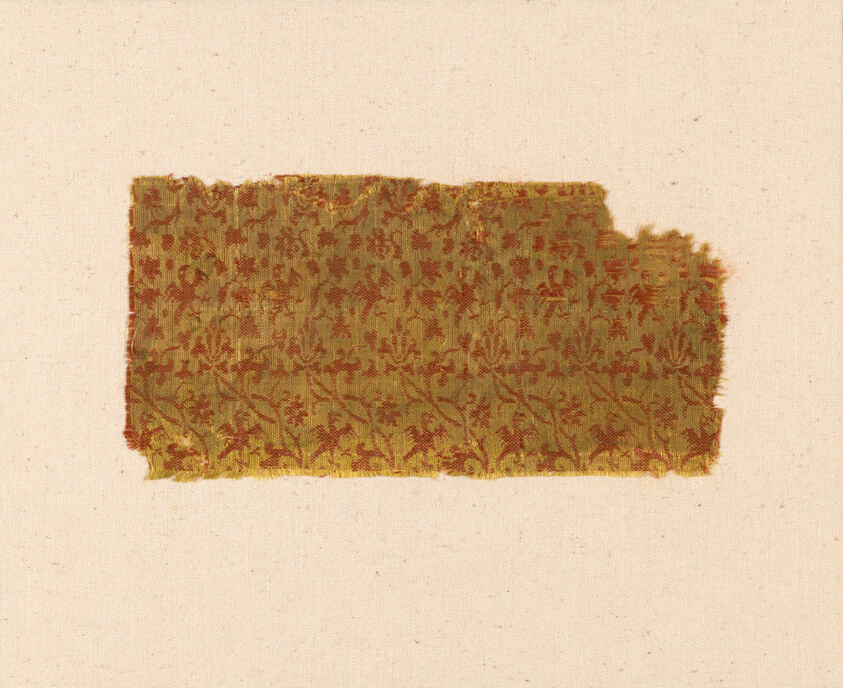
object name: Textile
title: Fragment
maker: Italy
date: 1360/80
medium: Silk, satin damask weave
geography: Italy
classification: textile; weaving